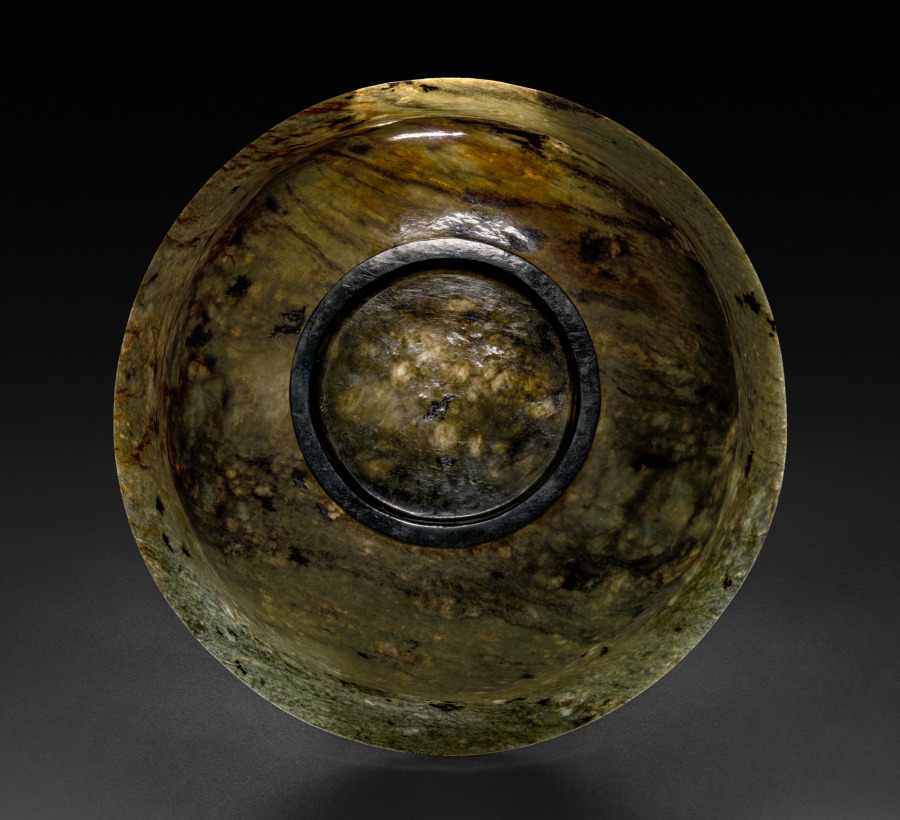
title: Bowl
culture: China, Qing dynasty (1644–1911), Qianlong reign (1736–95)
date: 1736–95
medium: spinach jade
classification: Jade